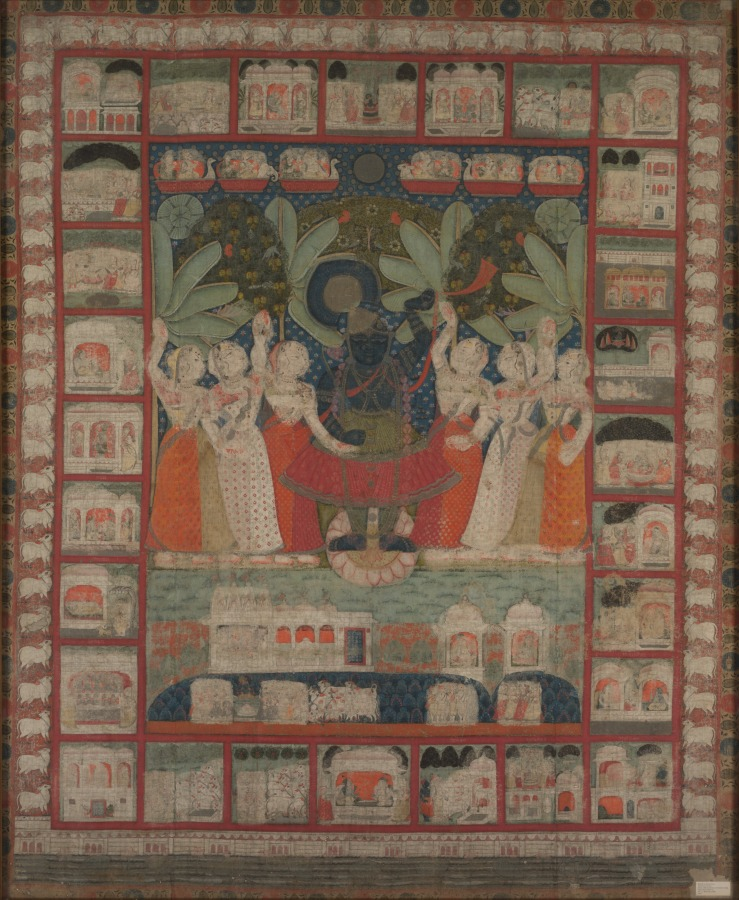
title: Pichvai of Shri Nathji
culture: Northwestern India, Rajasthan, Nathdwara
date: 1825–50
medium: Gum tempera, silver, and gold on cotton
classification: Painting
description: Painted-cloth devotional wall hangings (pichvai) form the backdrop to the worship of Krishna as Shri Nathji. As a result of long-term exposure, these textiles are usually faded and worn. The icon of Krishna as Shri Nathji is the central figure. On either side of him, milkmaids with arms entwined join him in a state of ecstasy. Experiencing the bliss of divine play (lila) with Krishna is the main religious goal for followers of the Pushti Marg sect of Hinduism to which this work belongs. Episodes from the life of Krishna and a border of adoring cows frame the central scene.